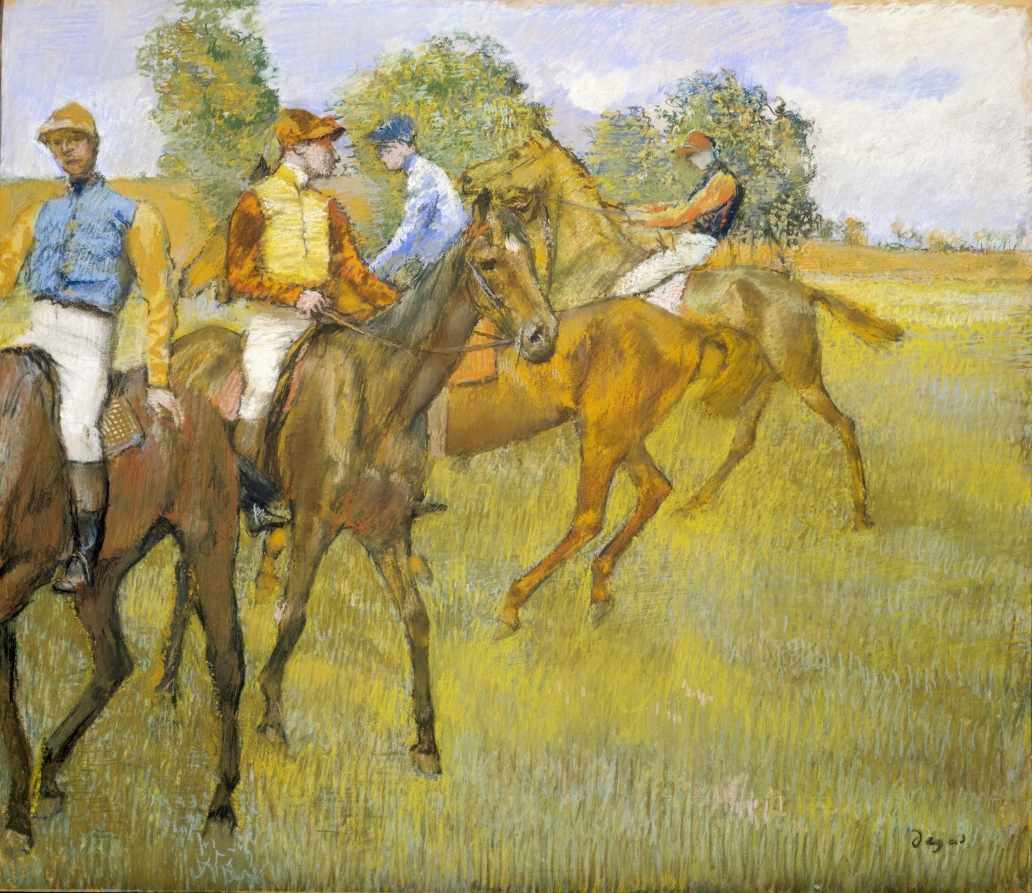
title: Before the Race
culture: France, 19th century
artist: Edgar Degas (French, 1834–1917)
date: c. 1887–89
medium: pastel with charcoal underdrawing on tracing paper mounted on cardboard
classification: Drawing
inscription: signed, lower right, in black pastel: Degas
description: Degas returned to the theme of horse and rider time and again throughout his career. Scholars believe that he executed the first version of this composition of four jockeys on horseback in a charcoal and pastel drawing. Several years later, he traced the composition, reversing its orientation to create the highly finished Cleveland pastel. The palette is intensified, the distance between the second and third jockeys is increased, and the foliage along the horizon has been added to suggest a lush spring day.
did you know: When creating the series to which this pastel belongs, Edgar Degas was inspired by the 19th-century photographer Eadweard Muybridge, who attempted to record motion in static images.